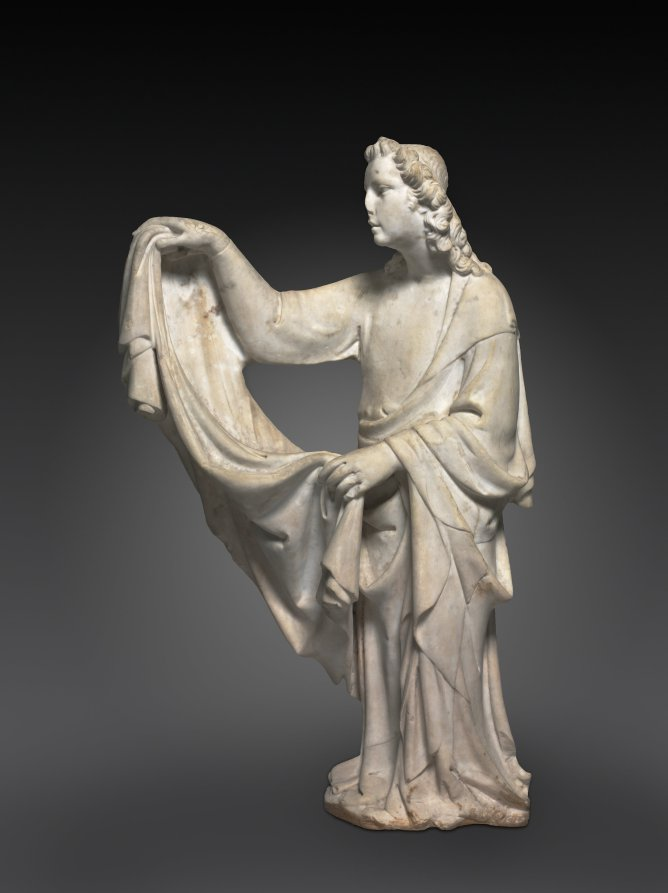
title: Angel from a Tomb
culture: Italy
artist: workshop of Tino di Camaino (Italian, c. 1285–1337)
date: 1330–50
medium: marble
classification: Sculpture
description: Tino da Camaino was active in Siena, Pisa, and Florence after 1311 where he established his reputation as an important and gifted sculptor. In 1323 he was summoned to the Angevin court at Naples, probably by King Robert of Anjou to work on the sepulchral monument of the king's daughter-in-law, Catherine of Austria. During the remainder of his life, Tino created a remarkable series of tomb sculptures in Naples. This pair of marble angels most likely represents the work of a member of Tino's workshop produced for one of these Neapolitan tombs, either during the final years of the master's life, or else independently after Tino's death in 1337.